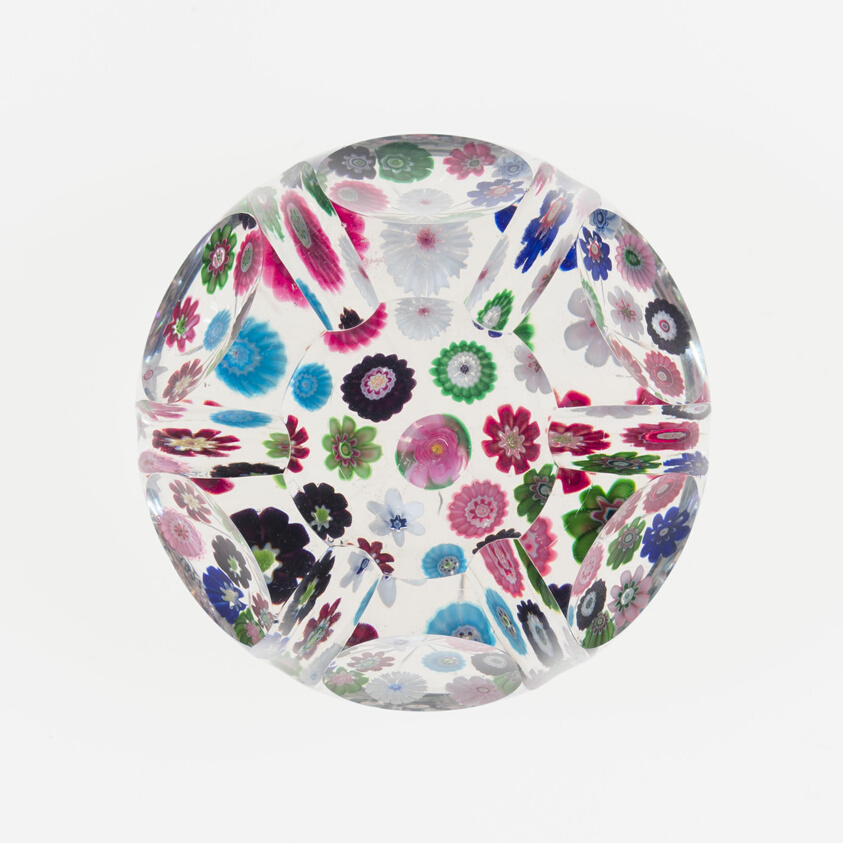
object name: Glass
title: Paperweight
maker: Clichy Glassworks (Cristalleries de Clichy); Clichy, France, 1837-1885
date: 19th century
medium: Glass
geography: Clichy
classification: paperweight; millefiori; european decorative arts; glass